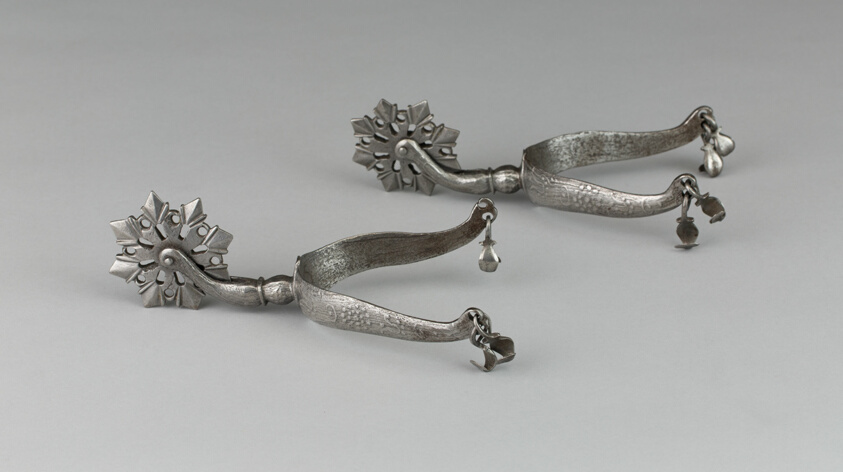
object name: Armor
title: Pair of Rowel Spurs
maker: North European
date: early 17th century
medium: Iron and silver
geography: Northern Europe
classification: horse equipment; armor; arms and armor